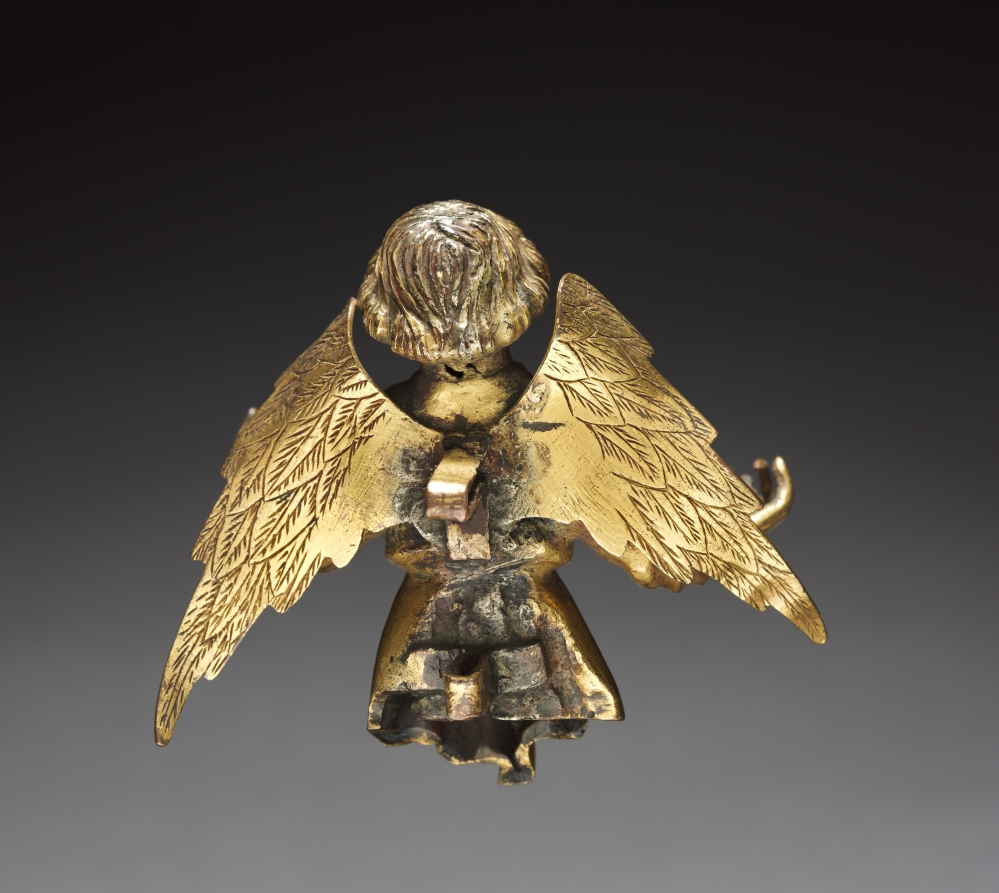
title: Angel from an Architectural Reliquary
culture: Franco-Netherlands or Paris, 15th century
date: c. 1400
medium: gilt bronze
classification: Sculpture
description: This beautiful Gothic angel is probably a surviving element from a large architectural reliquary. The last clue to its lost context disappeared when the symbolic attribute was twisted from the angel’s fingers, possibly during the destructive zeal of the French Revolution. The technique and style are characteristic of the lay workshops employed by the Valois courts during the early 1400s.